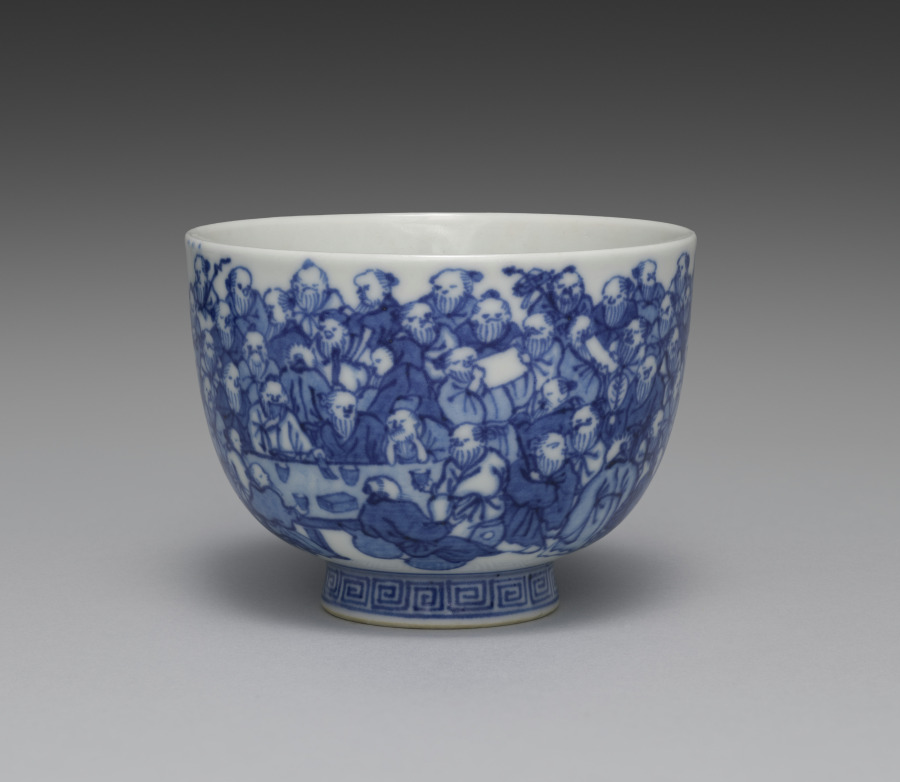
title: Teacup from Teacups with a Hundred Sages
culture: Japan, Meiji period (1868–1912)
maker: Seifū Yohei III (Japanese, 1851–1914)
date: 1893–1914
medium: One from a set of five teacups; porcelain with underglaze blue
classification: Ceramic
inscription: 清風造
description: Each of these five teacups has a painting of identical design in underglaze blue, but as the tiny figures are drawn entirely by hand, each cup has its own personality. The theme of the sencha cups is an assembly of sages or immortals, literally “a hundred venerable [people]” (hyakurō). The myriad figures crowd the scene in groups. The god of longevity, with his tall forehead, sits with his cranes, having flown in from Mt. Penglai on the Isle of the Immortals. Seven long-bearded sages sit around a stone table, chatting and drinking; one is seated on an enormous gourd. Of course, there is a stack of books on the table, and elsewhere, scrolls are being written upon or read—in one case held very close by a sage who is wearing glasses. The design was enormously popular in ceramics made for those engaged in literati culture.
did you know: Seifū Yohei III (1851–1914) produced many works for tea gatherings where people drank Chinese-style leaf-tea (sencha).